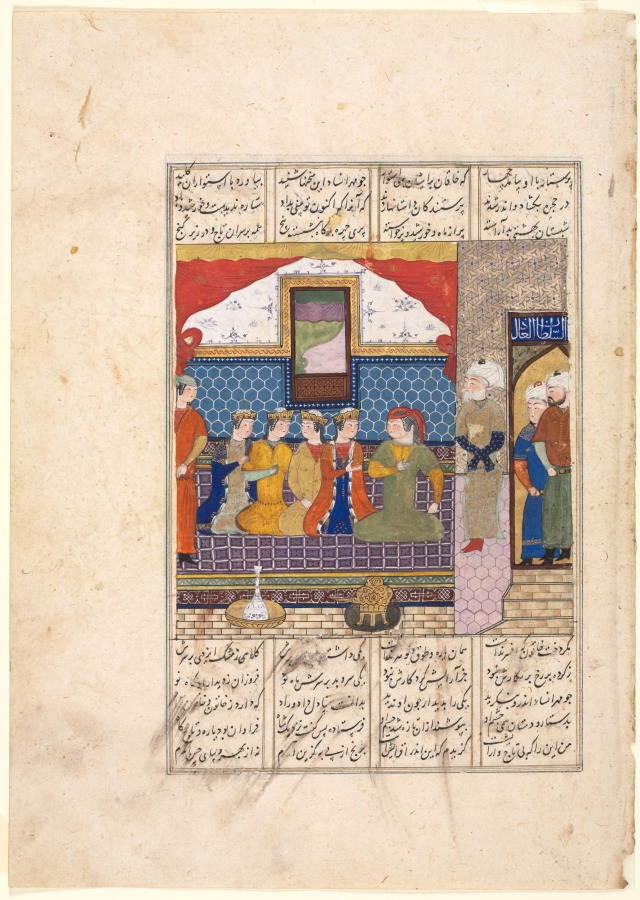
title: Nushirwan Sends Mihran Sitad to Fetch the Daughter of the King of China (Recto); The Forty-Eighth Year of Nushirwan's Reign. The Combat of the Khaqan of China with the Haithalians (Verso)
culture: Iran, Shiraz, Timurid period (1370-1501)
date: c. 1482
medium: opaque watercolor, ink, and gold on paper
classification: Manuscript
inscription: Script: Nasta'liq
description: The Iranian painting traditions of creating a conceptual space, symmetry, and decoration characterize this illustration of a scene in the life of the Shi’a Imam Ali, son-in-law of the Prophet Muhammad. The inscription over the door reads “the just sultan.”